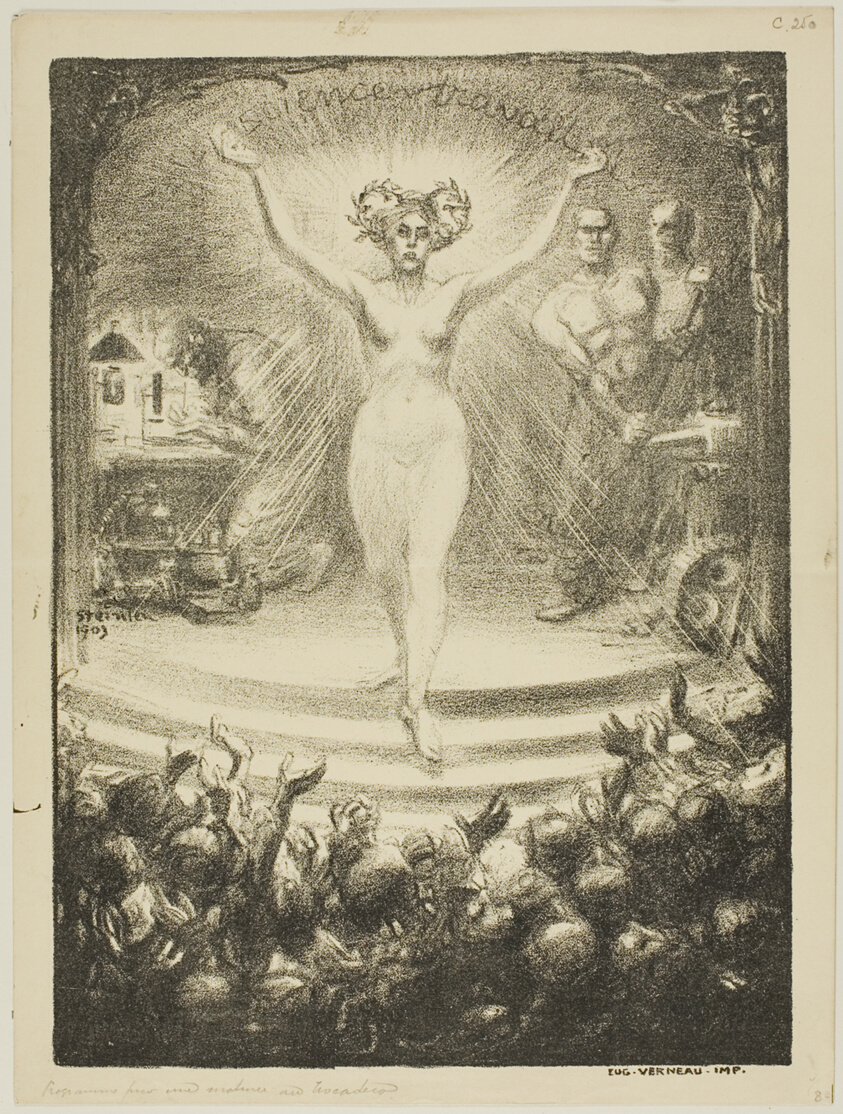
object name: Print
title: Program for a Matinée at the Trocadéro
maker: Théophile-Alexandre Steinlen; French, born Switzerland, 1859-1923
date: 1903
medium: Lithograph in black on cream wove paper with program text, verso, in brown-red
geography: France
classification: lithograph; print; prints and drawing